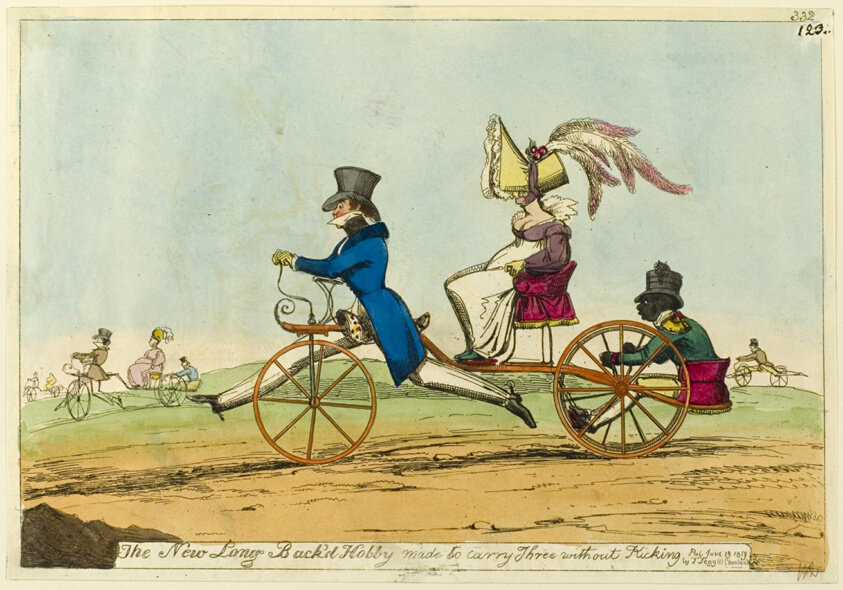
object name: Print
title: The New Long Back'd Hobby made to carry Three without Kicking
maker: Attributed to William Heath (English, 1794-1840); published by Thomas Tegg (English, 1776-1845)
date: published June 19, 1819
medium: Hand-colored etching on ivory wove paper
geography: England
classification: etching; print; prints and drawing